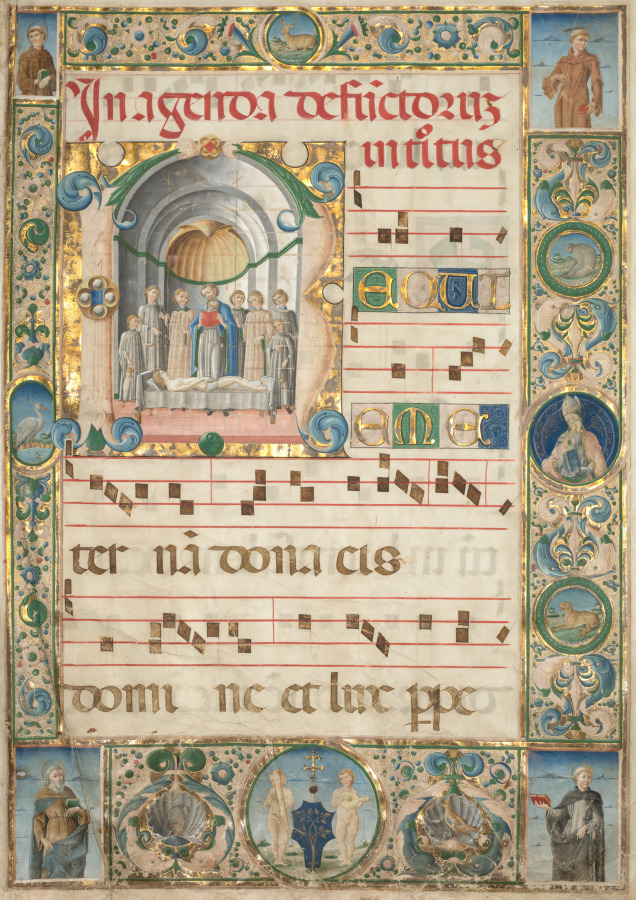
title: Leaf from a Gradual: Initial (R) with Mass for the Dead (recto)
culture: Italy, Ferrara, 15th century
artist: Jacopo Filippo d' Argenta (Italian, 1501)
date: c. 1480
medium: ink, tempera, and gold on parchment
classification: Manuscript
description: This leaf was excised from a volume of a large set of choral books known to have been commissioned by Bartolomeo delle Rovere for Ferrara Cathedral. Delle Rovere, nephew of Pope Sixtus IV, was the Bishop of Ferrara from 1474 to 1494 and his arms appear in the rondel at the bottom of the page: a shield bearing an oak tree (rovere in Italian) surmounted by a patriarchal cross, the symbol of his rank and authority. Payment records indicate that Argenta worked on the choir books for Ferrara Cathedral from 1478 to 1486. The large historiated initial R dominates the extensive decoration including a realistically painted scene in which a priest (center) surrounded by acolytes stands over the body of the deceased as he reads the Office of the Dead. The ceremony takes place within a vaulted chapel that recedes in space to create the illusion of perspective.